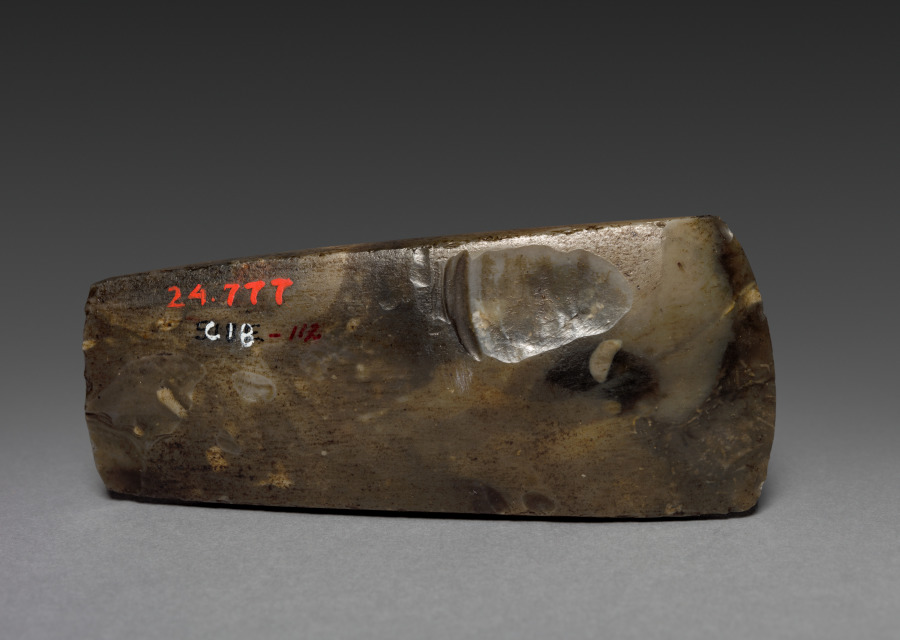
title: Hatchet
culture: Germany, Austria, Celt, Neolithic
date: 7000–1700 BCE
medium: flint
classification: Stone